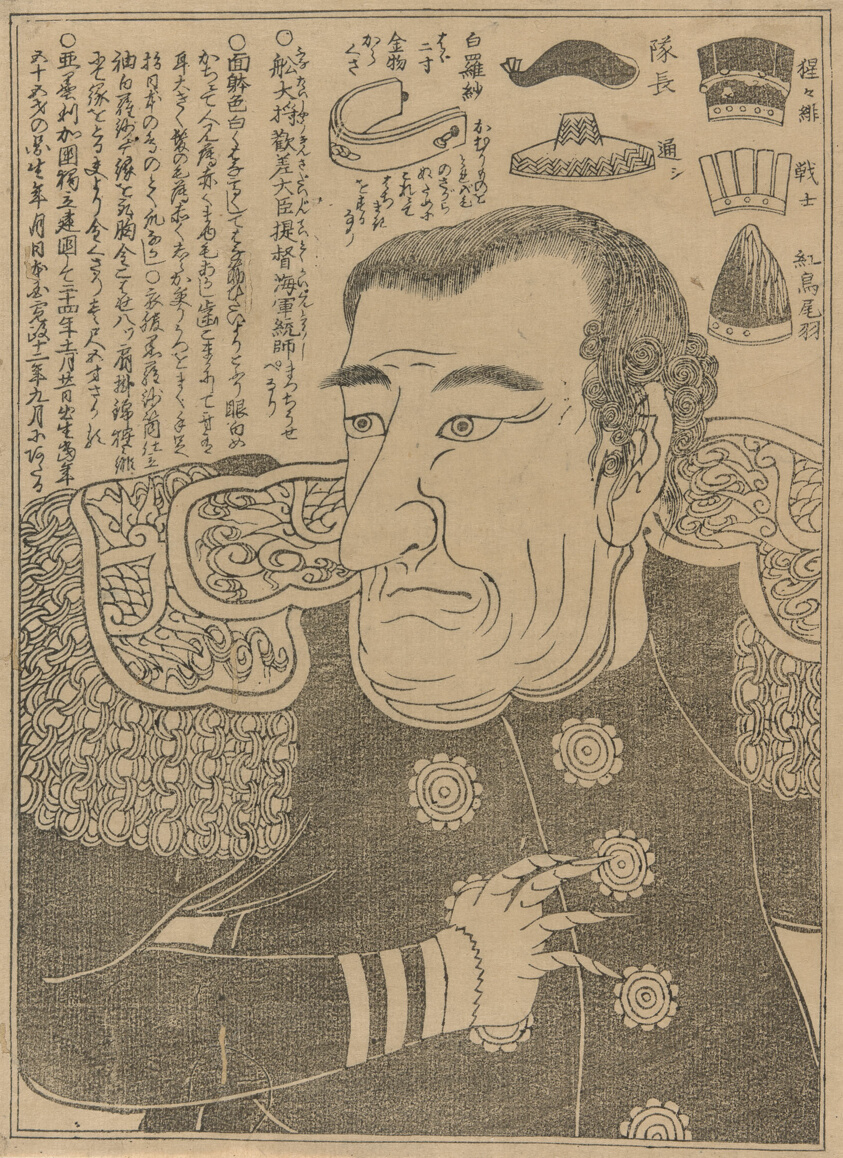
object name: Print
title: Commodore Perry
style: Japanese (culture or style)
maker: Artist unknown; Japanese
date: c. 1853/54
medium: Woodblock print; oban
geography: Japan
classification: woodblock print; print; asian art; woodblock